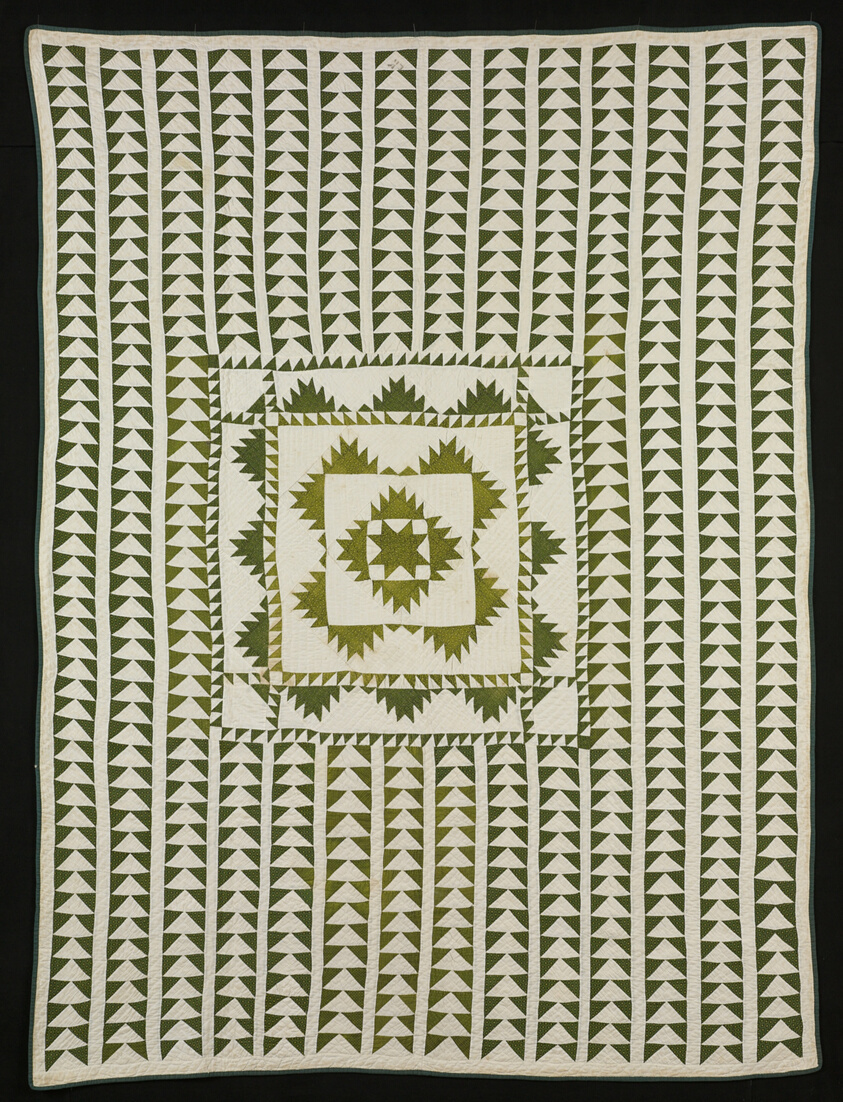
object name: Textile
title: Bedcover ("Flying Geese" Quilt)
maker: United States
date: 19th century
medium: Cotton, plain weaves; pieced; some printed; quilted; backed with cotton, plain weave; edged with cotton, plain weave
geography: United States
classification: needlework - quilt; textile